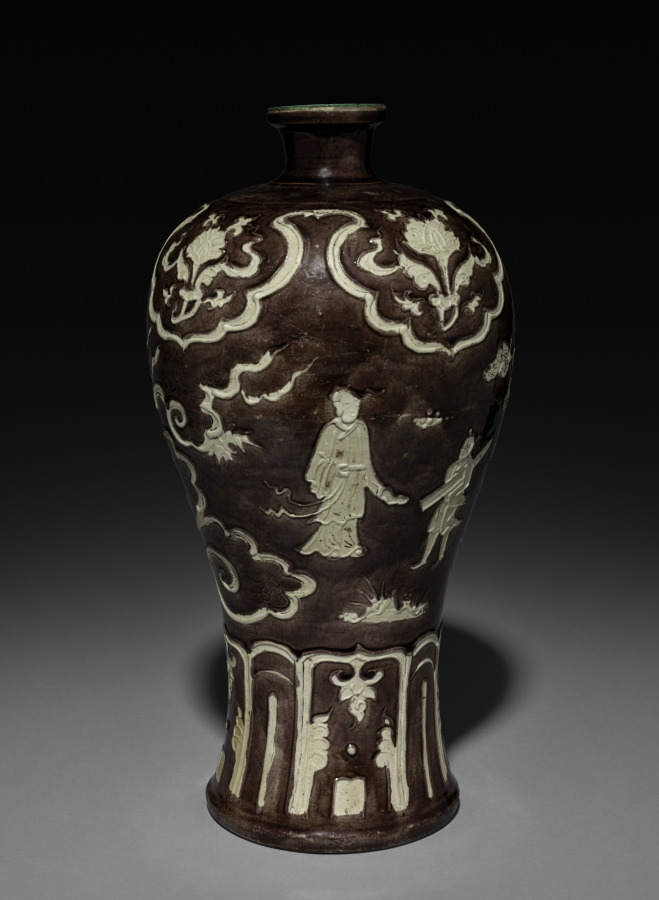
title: Vase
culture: China, Jiangxi Province, Ming dynasty (1368–1644)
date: late 1400s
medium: porcelain, Fahua ware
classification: Ceramic